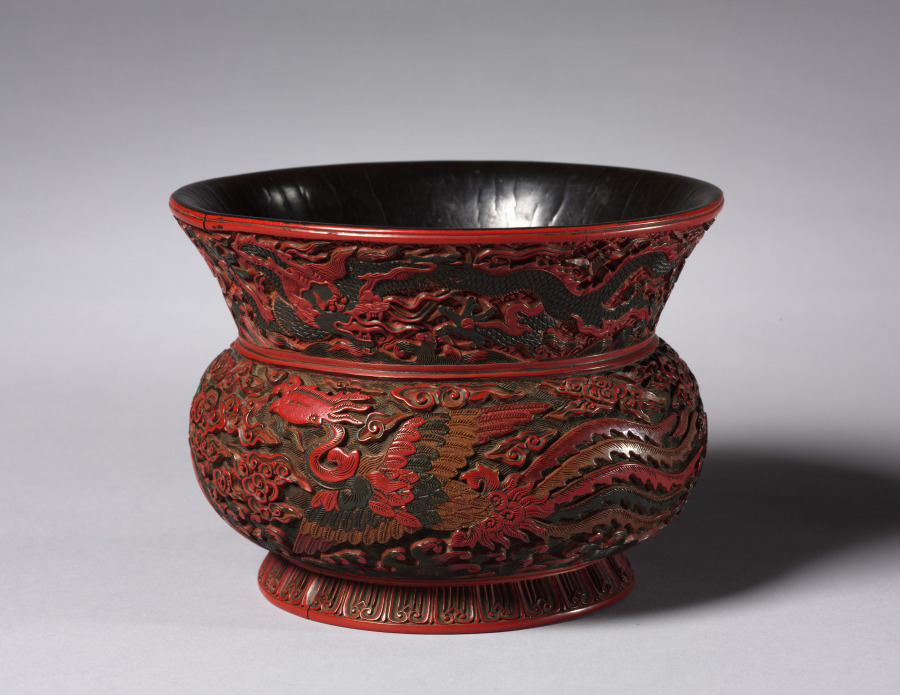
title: Jar with Dragon and Phoenix Design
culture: China, Jiangxi province, Jingdezhen, Ming dynasty (1368-1644), Jiajing mark and reign (1522-66)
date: 1522–66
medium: carved lacquer in cinnabar and other colors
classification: Lacquer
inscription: 大明嘉靖年製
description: A phoenix and dragon alternating with two auspicious ornate characters—“fortune” 福（fu) and “longevity” 壽 (shou)—adorn this exquisitely carved lacquer jar. Similar to contemporary five-color (wucai) decoration on porcelain, this jar shows layers of lacquer in black, ochre, green, and cinnabar (red). In a time-consuming process, a multitude of lacquer coatings were applied to the wooden core before its design could be carved into the surface. The phoenix and dragon are imperial emblems suggesting that this jar was made for the court. The base of the jar is inscribed: “Made in the Jiajing-era of the Great Ming [dynasty].”